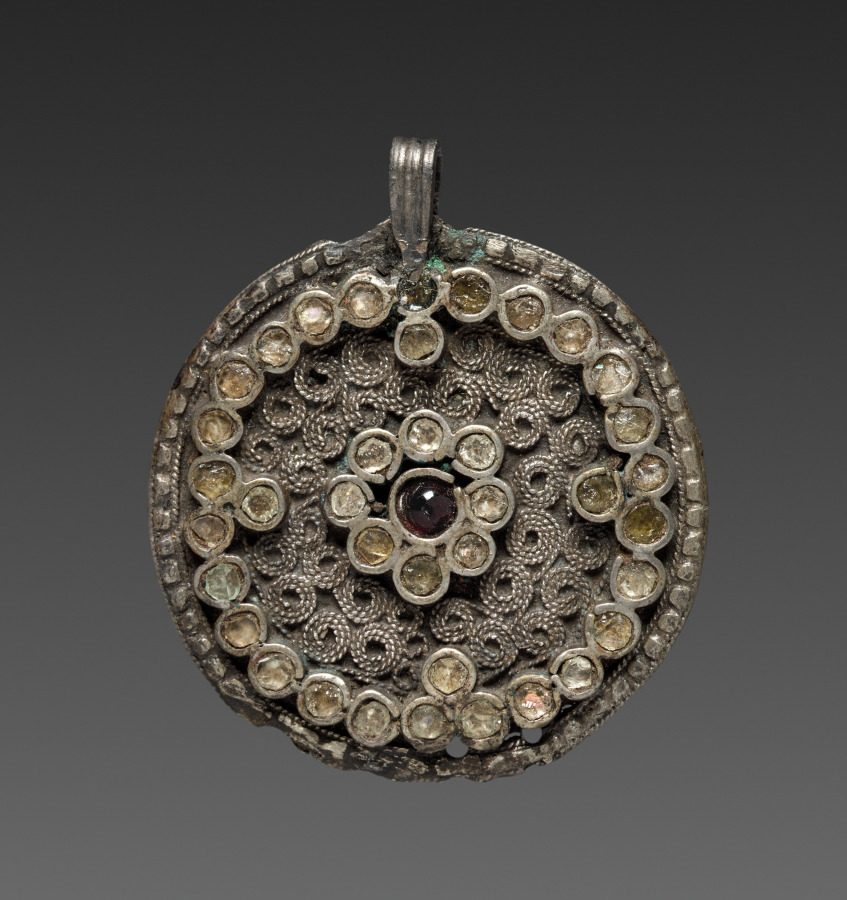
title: Disk Pendant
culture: Merovingian, Migration period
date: 300s–700s CE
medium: silver with glass inlays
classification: Jewelry